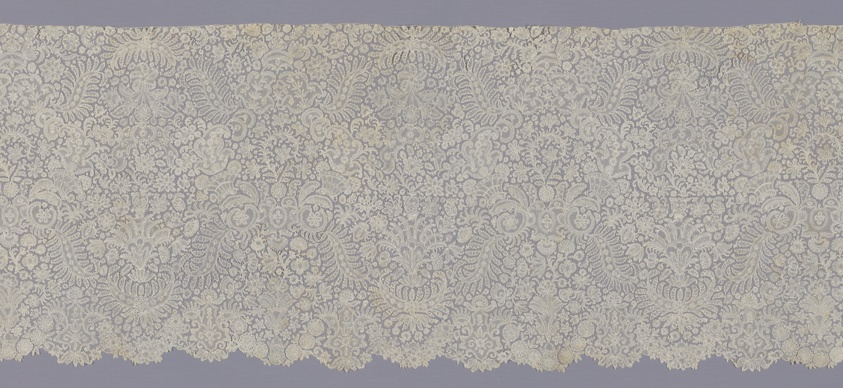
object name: Textile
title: Lace Flounce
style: 18th Century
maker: Brussels, Flanders (present day Belgium)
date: 1720–40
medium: Linen, bobbin part-lace of a type known as "Brussels" with a plaited bar ground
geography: Flanders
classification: textile; lace - bobbin; costume - lace